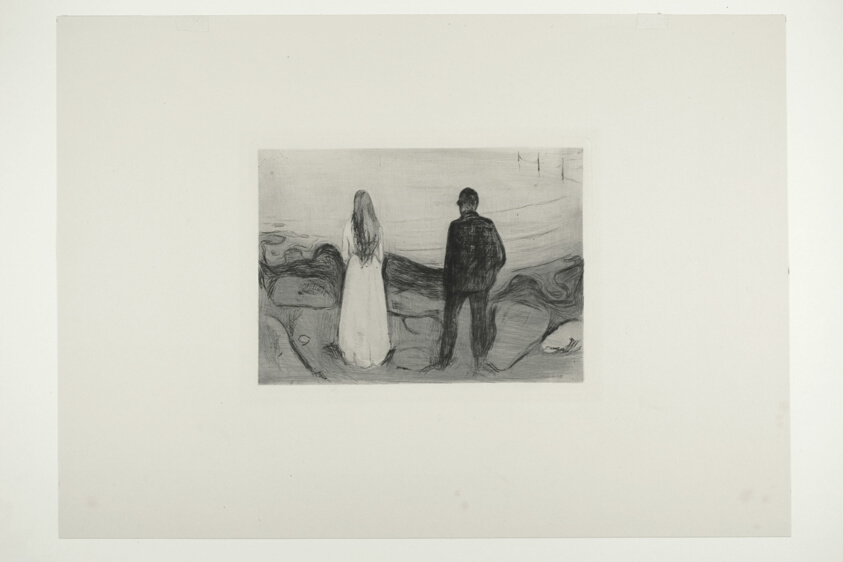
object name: Print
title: Two Human Beings. The Lonely Ones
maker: Edvard Munch (Norwegian, 1863-1944)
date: 1894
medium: Drypoint, roulette, and burnisher on copper plate printed on cream wove paper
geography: Norway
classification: drypoint; print; prints and drawing